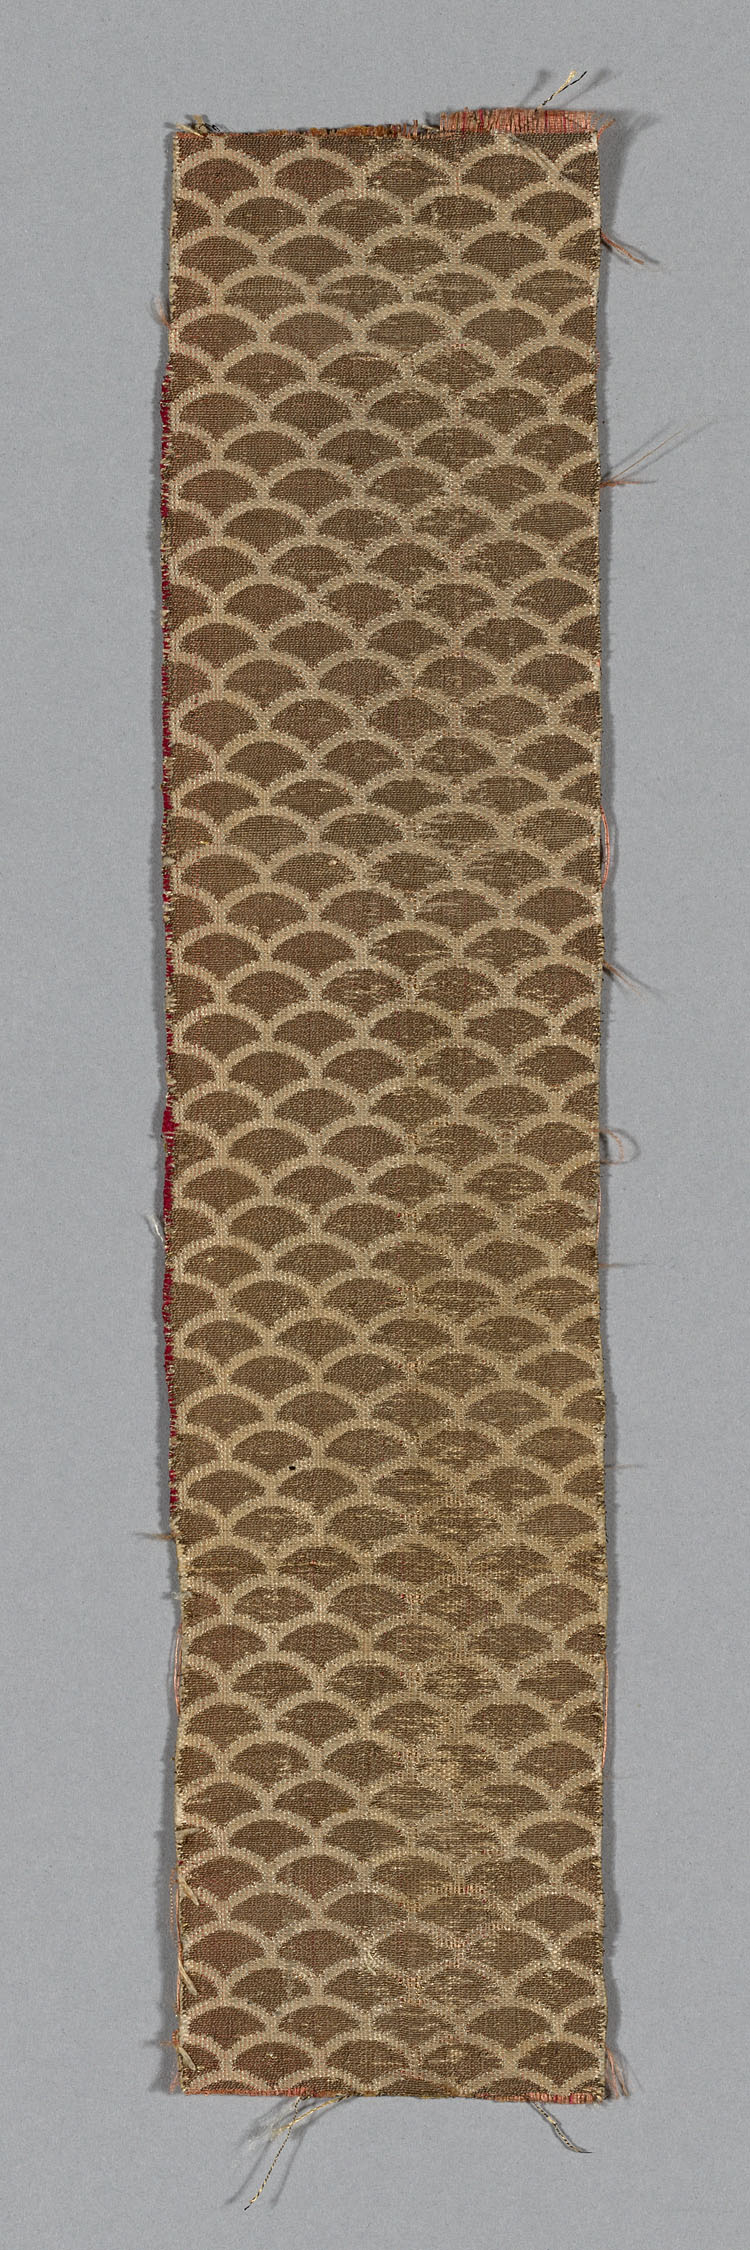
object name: Textile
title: Fragment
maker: France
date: 19th century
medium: silk, plain compound cloth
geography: France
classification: textile; weaving